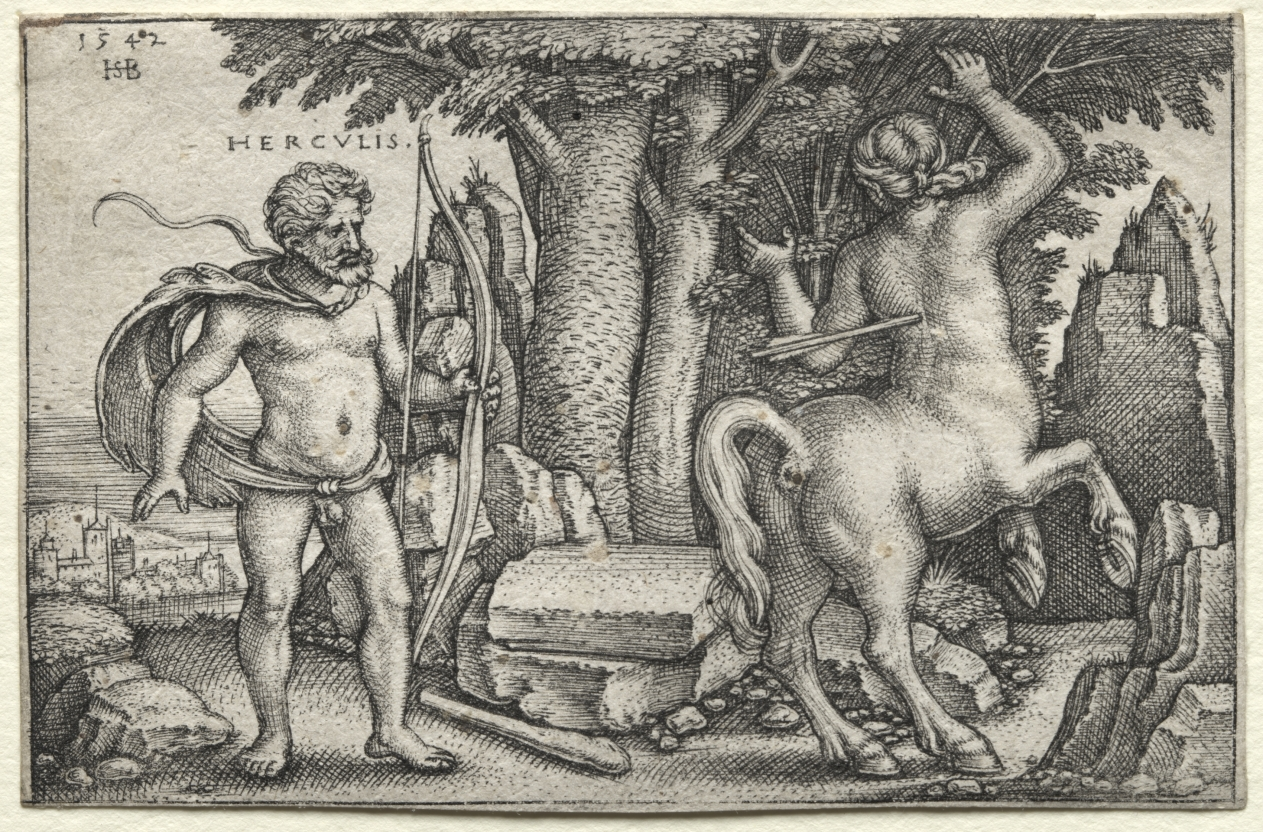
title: The Labors of Hercules: Hercules and Nessus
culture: Germany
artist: Hans Sebald Beham (German, 1500–1550)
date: 1542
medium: engraving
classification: Print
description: Beham was one of several German printmakers referred to today as the “Little Masters.” They established their artistic prowess by engraving remarkably small prints, appealing to collectors fascinated with miniature objects and curiosities. Here, Beham has packed 12 larger-than-life stories of the mighty Hercules into tiny prints. The series includes three of the 12 labors Hercules performed as penance for slaying his children in a fit of madness: Strangling the Nemean Lion, Killing the Lernean Hydra, and Dragging Cerberus from the Underworld. The other scenes depict tales from his life and the events preceding his death. The son of Jupiter and the mortal Alcmena, Hercules was both man and god. His saga of moral and physical trials made him one of the most popular classical heroes in Renaissance art.